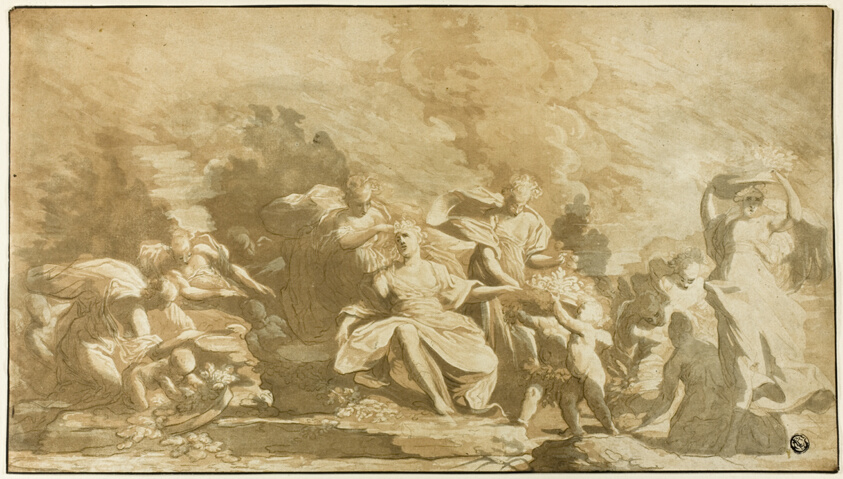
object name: Print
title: The Kingdom of Flora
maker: Johann Gottlieb (Theophilius) Prestel (German, 1739-1808); after Giovanni Battista Ferretti (Italian, 17th century)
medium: Aquatint in brown and black, with burnishing, stipple etching, etching, bordered in dark brown ink on ivory laid paper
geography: Germany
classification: drawings (visual works); prints and drawing; print